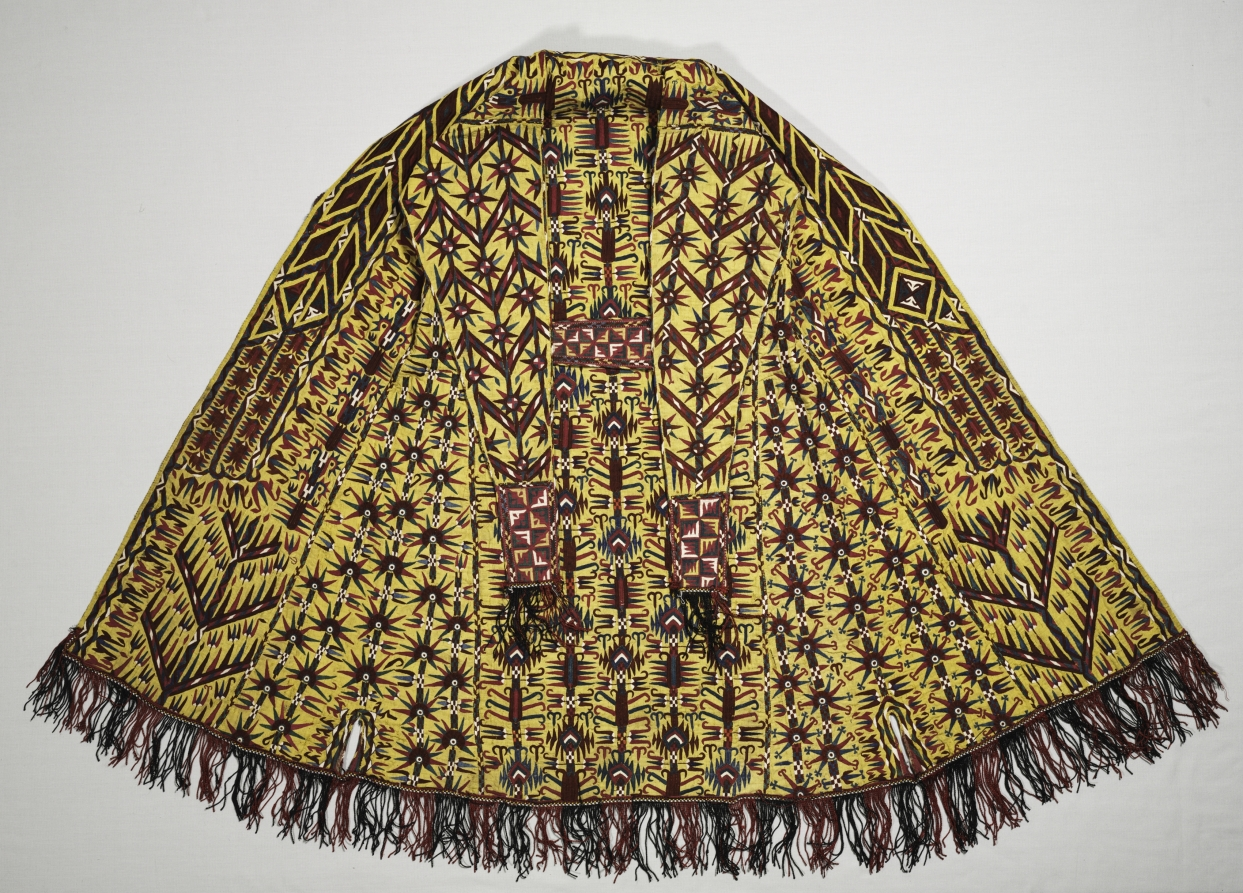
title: Woman’s Mantle (Chyrpy)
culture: Central Asia, Turkmenistan, Tekke tribe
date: late 1800s–early 1900s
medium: Exterior: silk; plain weave; embroidery: chain stitch; Trim: silk; tablet-woven with fringe; Lining: cotton; plain weave, block printed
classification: Garment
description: Traditional costumes in central Asia have distinctive characteristics that indicate ethnicity, age, and class. One of the oldest examples is a woman’s coat with false sleeves attached on the back and worn over the head. This silk coat in yellow, the color worn by middle-aged women, is elaborately decorated with popular stylized tulips embroidered in chain stitch. Worn consistently by a newlywed, the coat was later only used on special occasions. Although women made and embroidered garments at home, this expensive luxury mantle was professionally made and sold in the marketplace.